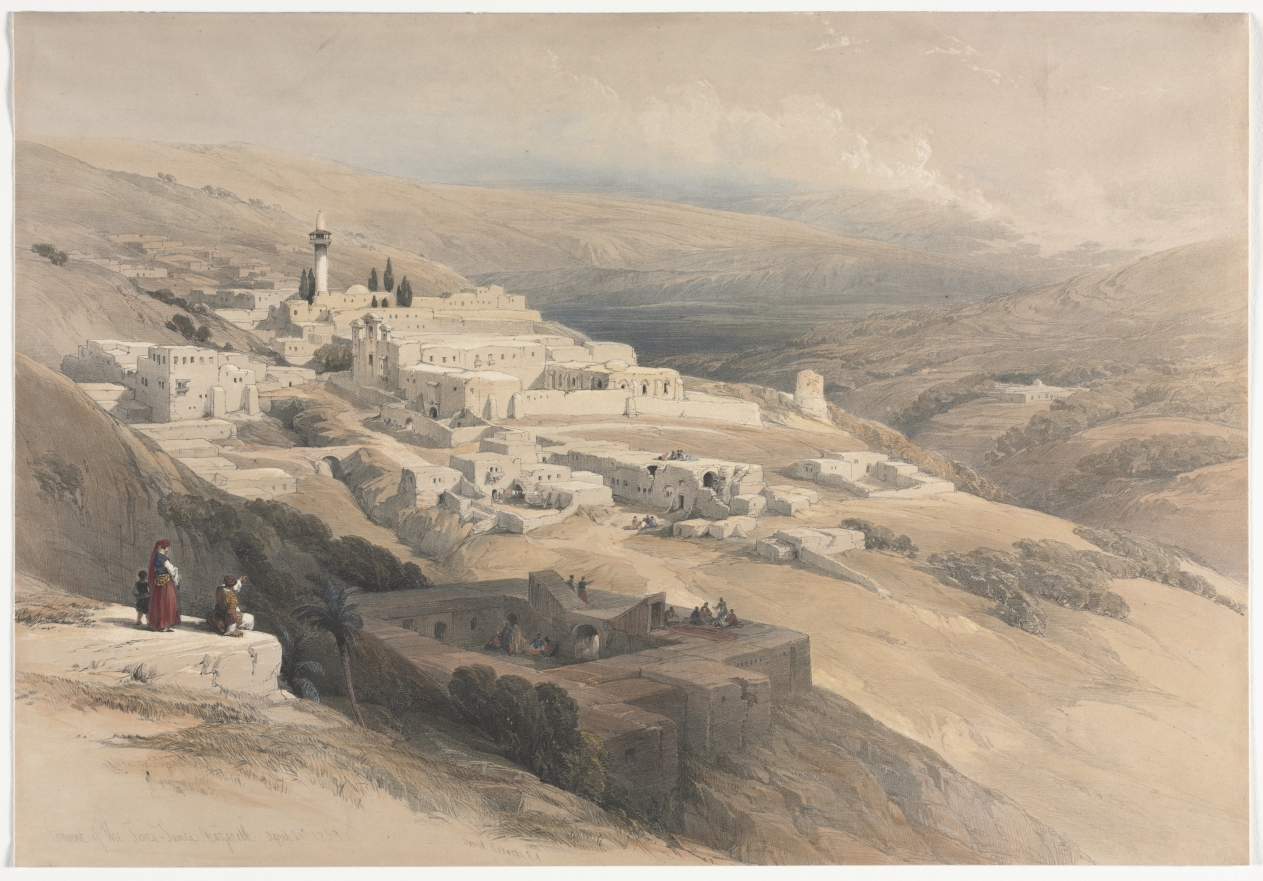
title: Convent of the Terra-Santa, Nazareth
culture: England, 19th century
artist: David Roberts (Scottish, 1796–1864)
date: 1839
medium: color lithograph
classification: Print